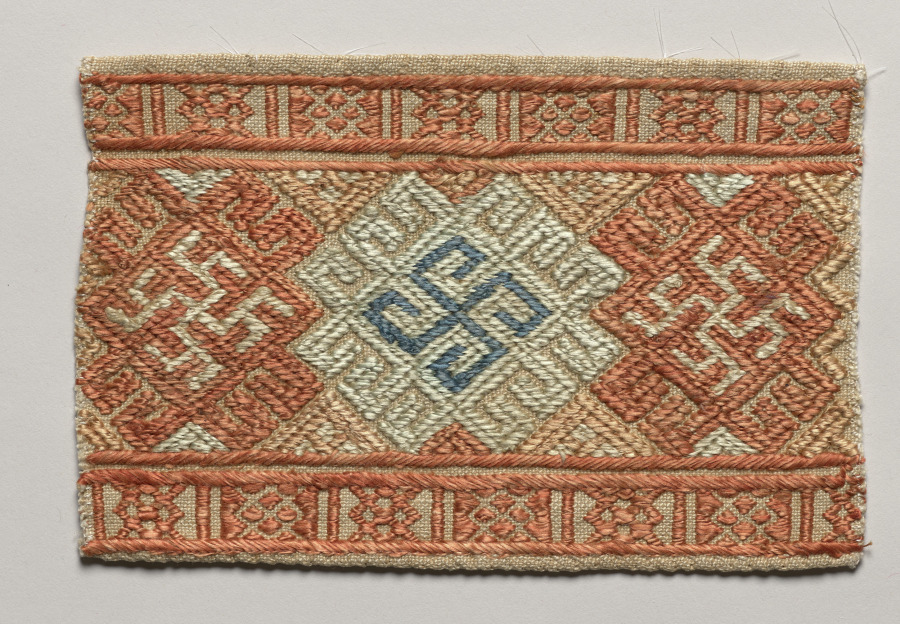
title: Panel for a Headdress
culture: Russia, Tambov province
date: 1700–1900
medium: Linen: plain weave; silk: embroidery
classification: Embroidery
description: This Russian embroidered panel was used to embellish a headdress. Textiles of this type are valuable for their embroidery depicting ancient folk motifs, ritual significance, exemplification of the role of textiles in Russian society, and connection to a prominent woman collector, Natalia de Shabelsky, without whom this textile and others like it might have been lost.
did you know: Embroidery was a common tradition in many cultures because it displayed the skill of the mother or daughter who stitched the embroidery.